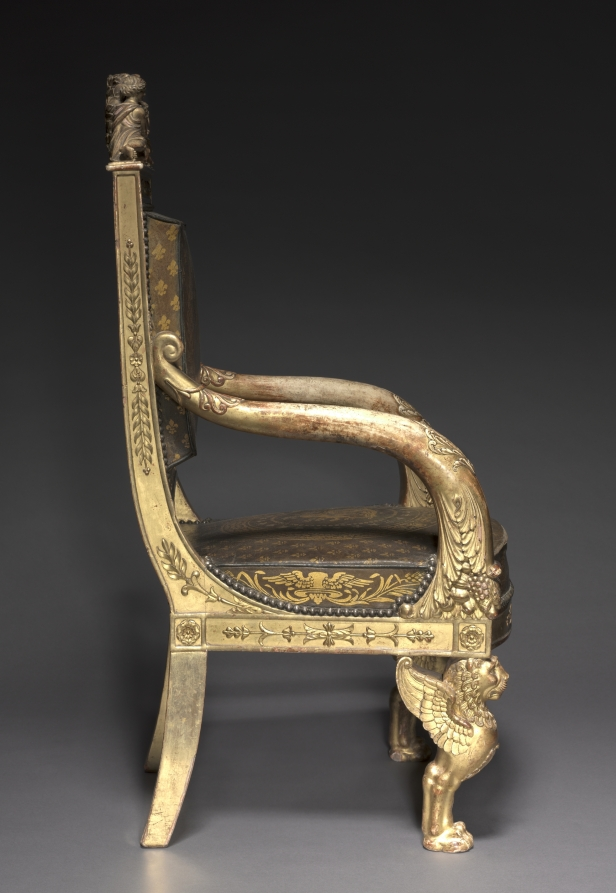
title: Child's Throne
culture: France, Paris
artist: Pierre-Marie Balny le Jeune (French, 1832)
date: 1822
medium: carved and gilded wood, leather upholstery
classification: Furniture and woodwork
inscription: inscribed with stencils inside back rail: BLONDEL TAPISSIER/RUE ST. ANTOINE N 72 1822 inscribed in ink lower edge back rail: 12 JANVIER 18[22?]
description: This chair was made for the young, presumed successor to the French throne who ruled briefly as Henri V in 1830, the last of the direct Bourbon line. He is depicted at the center of the top rail protected by female figures representing France and Minerva, the Roman goddess of wisdom. Fleurs-de-lis and the Gallic rooster, symbols of French royalty and the French people, decorate the upholstery.